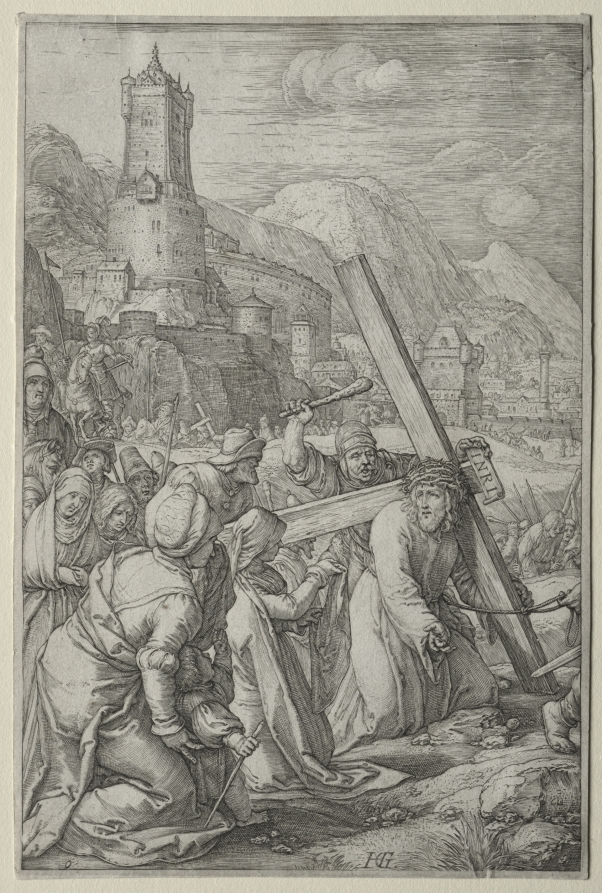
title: The Passion: Christ Carrying the Cross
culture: Netherlands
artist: Hendrick Goltzius (Dutch, 1558–1617)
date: 1596–98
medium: engraving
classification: Print